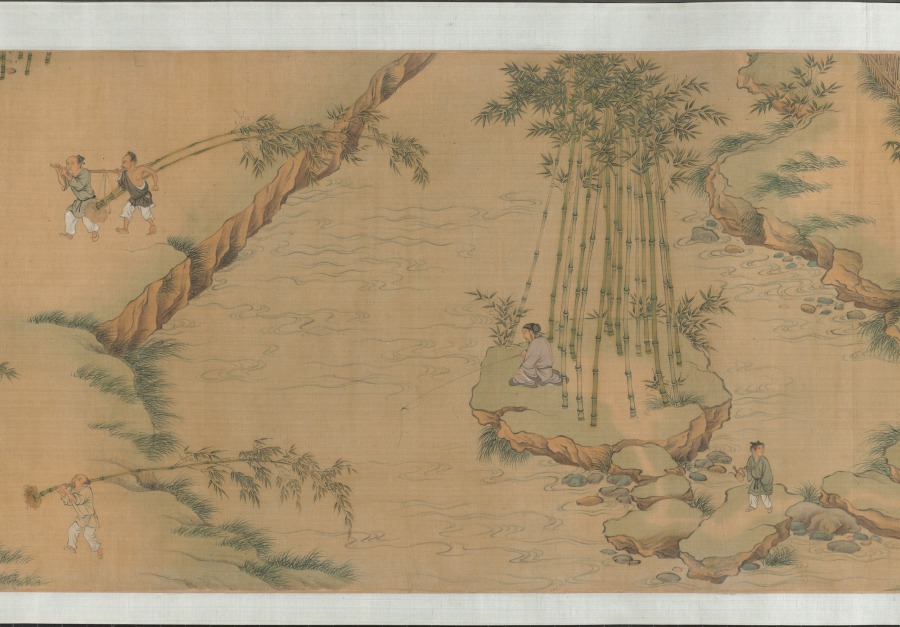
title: Garden for Solitary Enjoyment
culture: China, Ming dynasty (1368–1644)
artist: Qiu Ying (Chinese, 1494–1552)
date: 1515–52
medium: Handscroll; ink and light color on silk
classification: Painting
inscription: Accompanying text of an essay together with seven poems of Sima Guang (1019–1086) and one poem of Su Shi (1037–1101) written by Wen Zhengming (1470–1559) in 1558.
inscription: 2 colophons and 82 seals: 4 seals of Wen Zhengming 文徵明 (1470–1559); 59 seals of Xiang Yuanbian 項元汴 (1525–1590); 1 colophon, dated 1644, and 7 seals of Xiang Yukui 項禹揆 (c. late 1500s–1659); 1 colophon, dated 1880, and 2 seals of Weng Tonghe 翁同龢 (1830–1904); 2 seals of Ch'eng Chen-i (19th c.); 1 seal of Han Ch'ung (19th c.); 4 seals of Wan-go H. C. Weng 翁萬戈 (1918–2020); 3 seals unidentified.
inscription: Colophon by Xiang Yukui 項禹揆 (c. late 1500s–1659): The painting of The Garden for Self-enjoyment on the right by Shih-chou, Mr. Qiu [Qiu Ying] is in the style of Li Lung-mien. Its mood is peaceful, as if meeting the ancient gentlemen face to face among the brushes and silk; it lifts one above the sordid bustle of life. Formerly, my late father handed me this scroll which had only the painting without the written essay. I considered asking a good calligrapher to write the essay to add to it but was afraid that the quality of the writing would not match the painting. Several years later, I saw at a friend's house this essay and poems (of Ssu-ma Kuang] written by Hengshan [Wen Zhengming], once owned by my grandfather; so I spared no expense to obtain it. I rejoiced at this and said: "The divine swords are finally united. How things are pre-destined!" Now my friend Chang Kung-chao's technique for mounting [painting and calligraphy] is excellent. Therefore by daring to take them out and join them together, I can preserve this beautiful story of singular reunion. Xiang Yukui recorded at Hai-yeh-t'ang [hall] two days before New Year's Eve in the jiasheng year of the Chongzhen era [1644]. trans. LYSL/HK/WKH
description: Garden of Solitary Enjoyment refers to a site built in 1073 by the statesman Sima Guang (1019–1086) after he had retired to Luoyang, Henan province. Every spring, visitors would flock to his garden. Each of its seven structures references a historic figure. Sima wrote: I channel streams [like Du Mu], to water flowers [like Bai Juyi], or trim bamboo [like Wang Huizhi]. . . . I know of no joy between heaven and earth that could take its place. Qiu Ying’s painting, created after an 11th-century version of the same theme, must have appealed to garden owners of the Ming dynasty, since it became the template for numerous Suzhou workshop copies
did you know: Sima Guang completed his monumental survey of Chinese history, Zizhi tongjian, in the garden depicted in this painting.